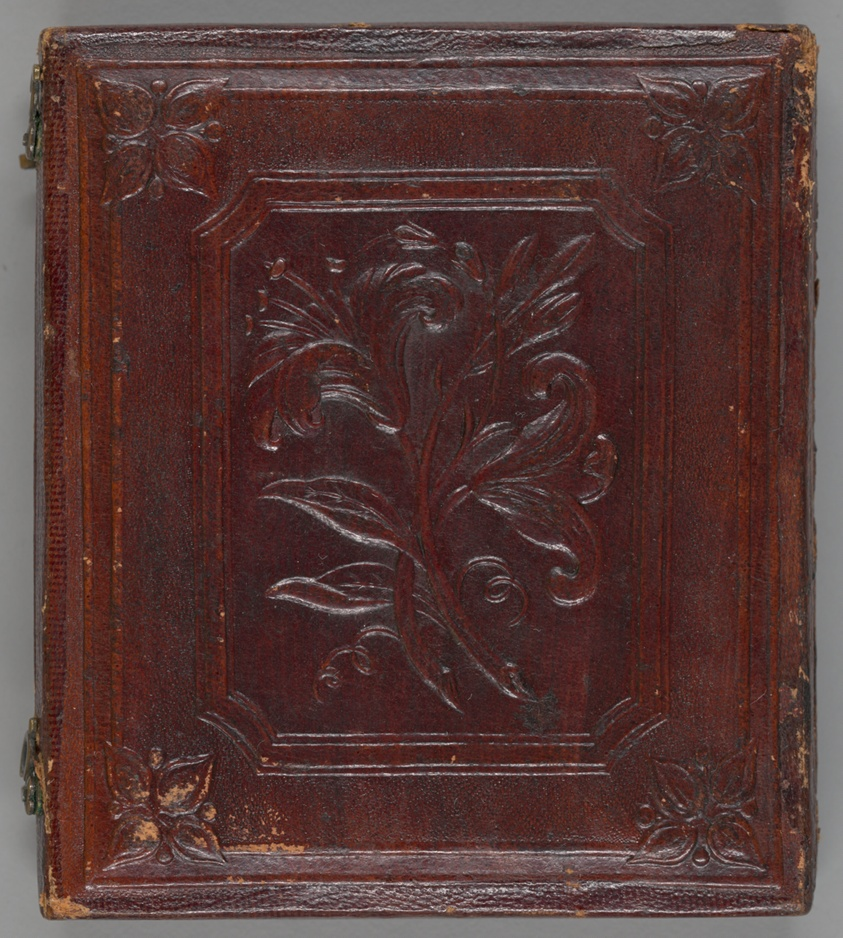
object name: Photograph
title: Untitled (Young Girl Holding Photograph)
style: 19th century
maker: Artist unknown; 19th century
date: 1839/99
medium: Daguerreotype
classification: photography; photograph